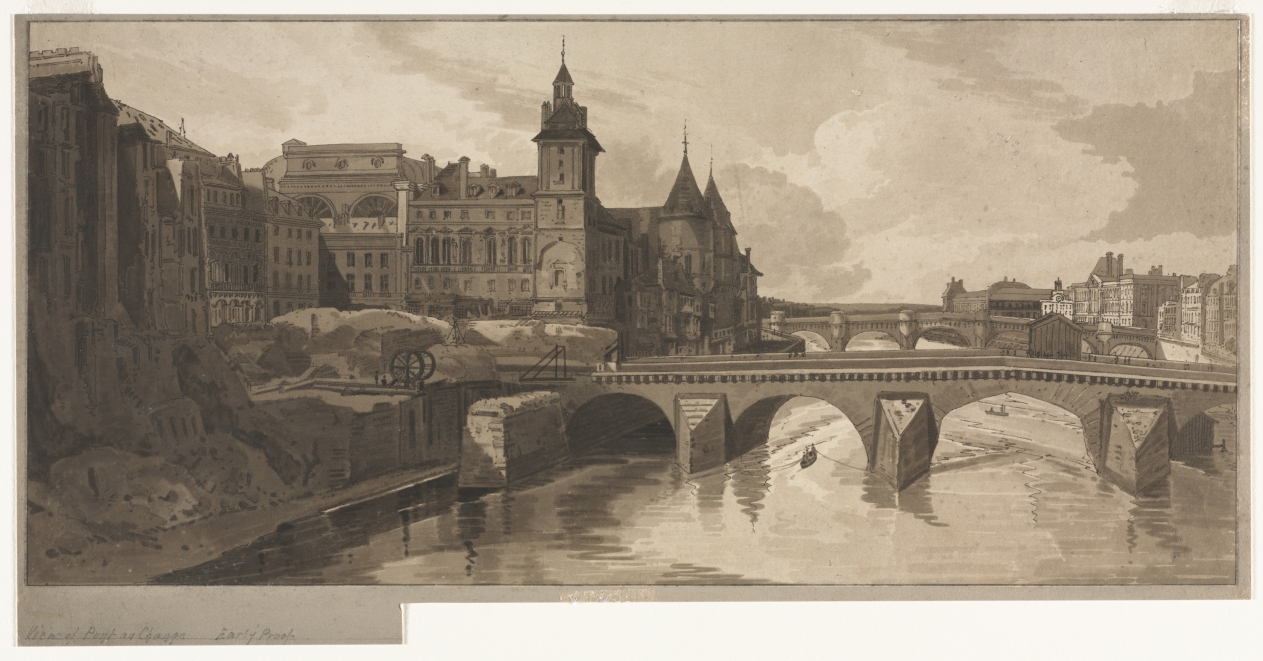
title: Selection of Twenty of the Most Picturesque Views in Paris:View of Pont au Change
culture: England, 19th century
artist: Thomas Girtin (British, 1775–1802)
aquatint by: Frederick Christian Lewis (British, 1779–1856)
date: 1802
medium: softground etching and aquatint printed in brown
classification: Print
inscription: Lower left, in graphite: View of Pont au Change Early Proof